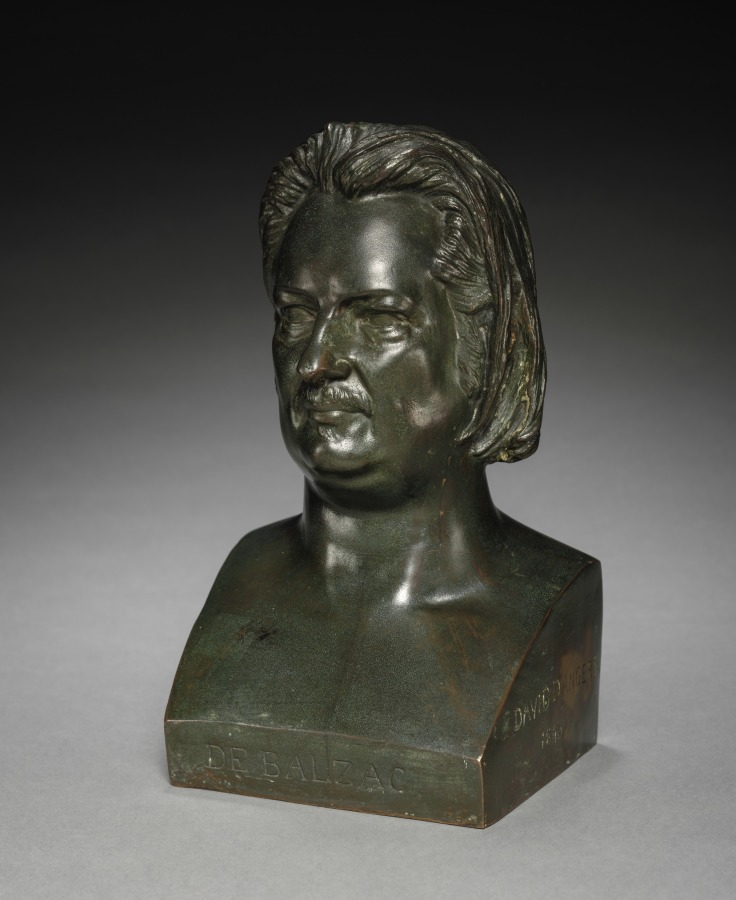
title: Head of Balzac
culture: France, 19th century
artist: Pierre-Jean David d'Angers (French, 1788–1856)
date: 1844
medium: bronze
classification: Sculpture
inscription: inscribed in lower front: "DE BALZAC." The artist's name and date ("DAVID DANGERS/1844") are inscribed on the left side, and the foundry's name ("F. BARBEDIENNE FONDEUR") is inscribed on the back. All inscriptions were made in the mold.